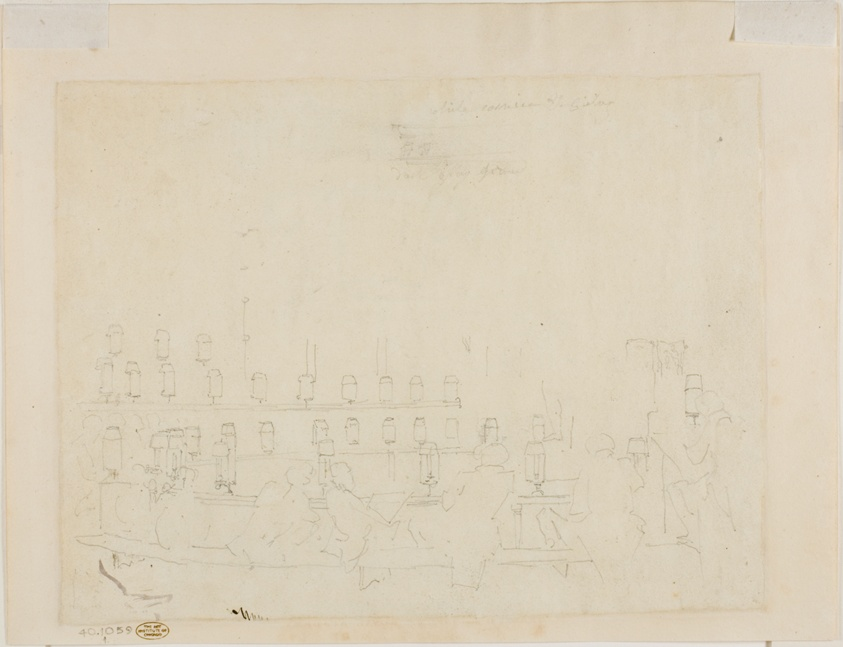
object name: Drawing and Watercolor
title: Study for Drawing from Life at the Royal Academy, Somerset House, from Microcosm of London (recto); Study for Drawing from Life at the Royal Academy, Somerset House, from Microcosm of London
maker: Augustus Charles Pugin (English, born France, 1762-1832); Thomas Rowlandson (English, 1756-1827)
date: c. 1808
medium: Graphite (recto and verso) on cream wove paper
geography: England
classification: graphite; drawings (visual works); prints and drawing